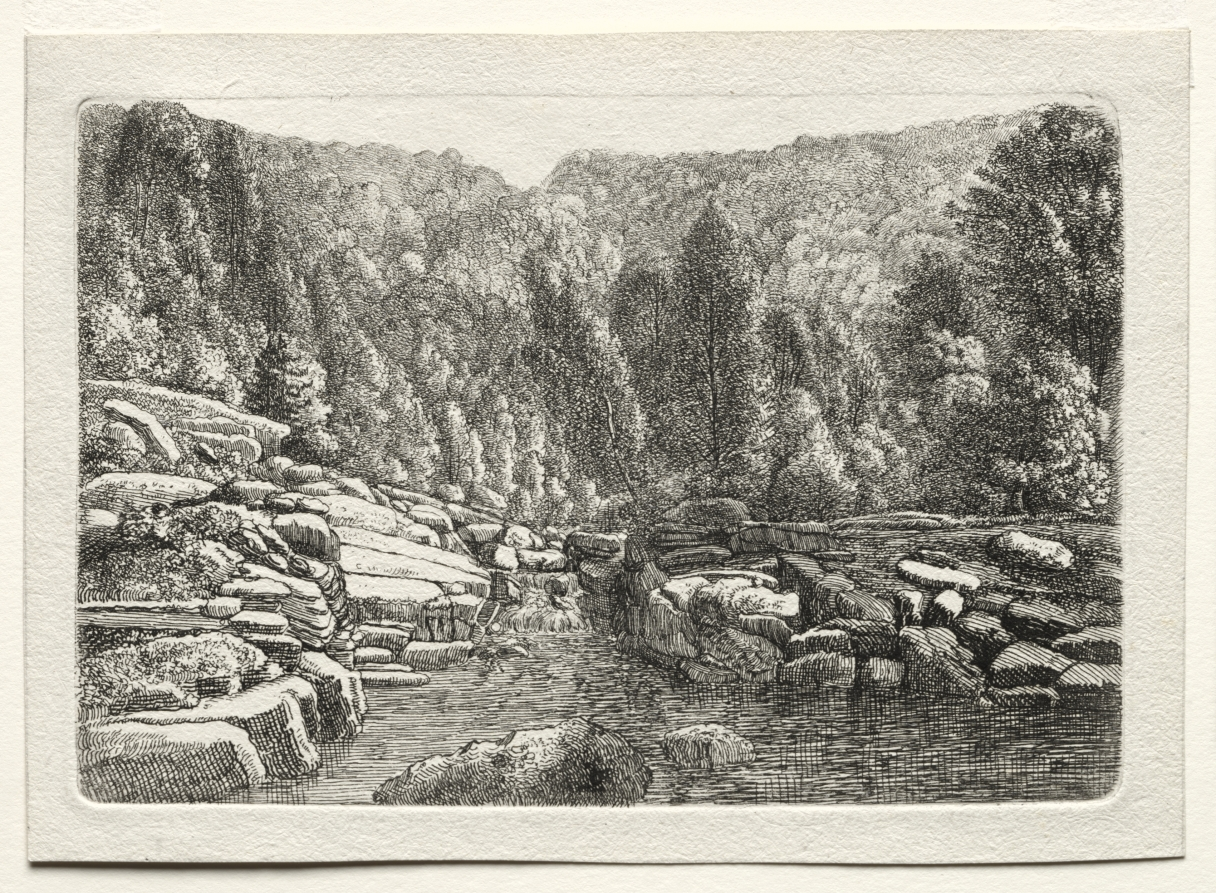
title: Water in the Mountains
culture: Germany, 18th century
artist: Christoph Nathe (German, 1753–1806)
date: c. 1790–1800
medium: etching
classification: Print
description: Nathe studied in Leipzig with Adam Friedrich Oeser, who taught many important figures of the period including the writer and philosopher Johann Wolfgang von Goethe and the archaeologist and art historian Johann Joachim Winckelmann. Oeser inspired Winckelmann’s philosophy "edle Einfalt, stille Grösse" (noble simplicity, quiet magnificence). Although Nathe went in his own direction, this meticulous landscape of sunlight striking rocks beside a brook reveals the influence of his teacher.